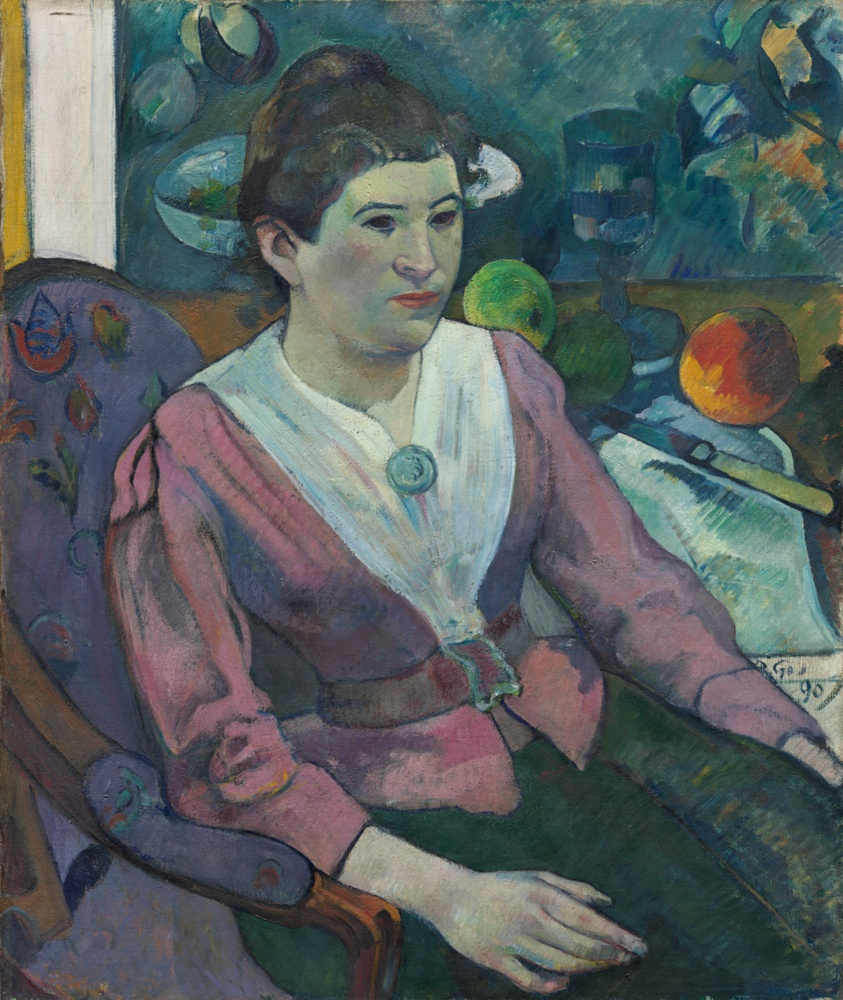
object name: Painting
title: Woman in Front of a Still Life by Cezanne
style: Post-Impressionism, 19th century, nineteenth century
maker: Paul Gauguin (French, 1848–1903)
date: 1890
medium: Oil on linen canvas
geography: France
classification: painting; french; oil on canvas; oil paintings (visual works); paint; european painting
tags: women, French, apples, artist, chair, knife, oranges, portrait, portraits: female subject, still life, table, portraits, Century of Progress, world's fairs, Chicago World's Fairs